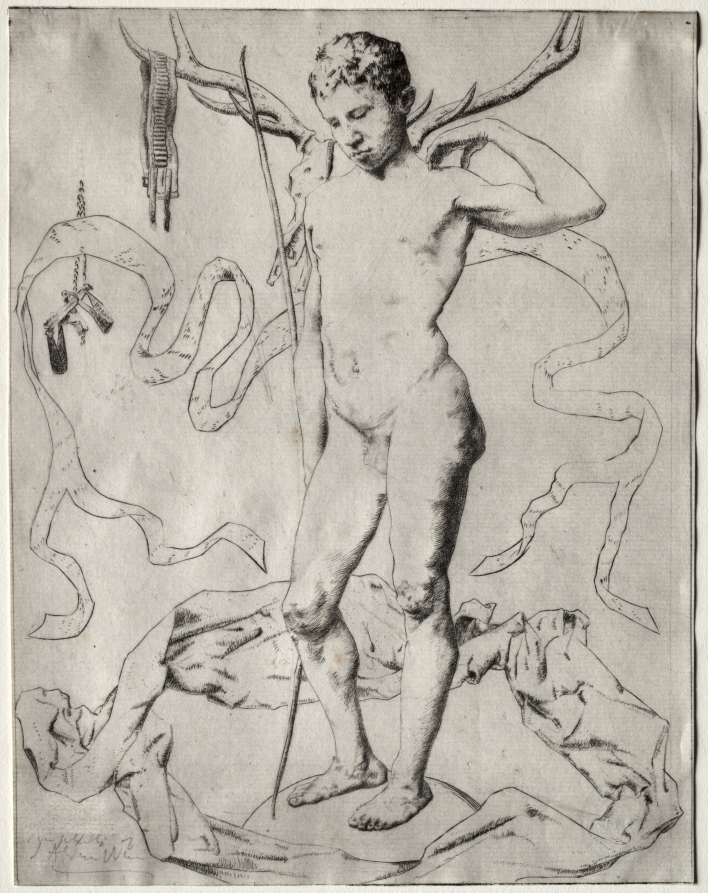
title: Arcturus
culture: America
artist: Julian Alden Weir (American, 1852–1919)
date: 1893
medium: engraving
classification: Print